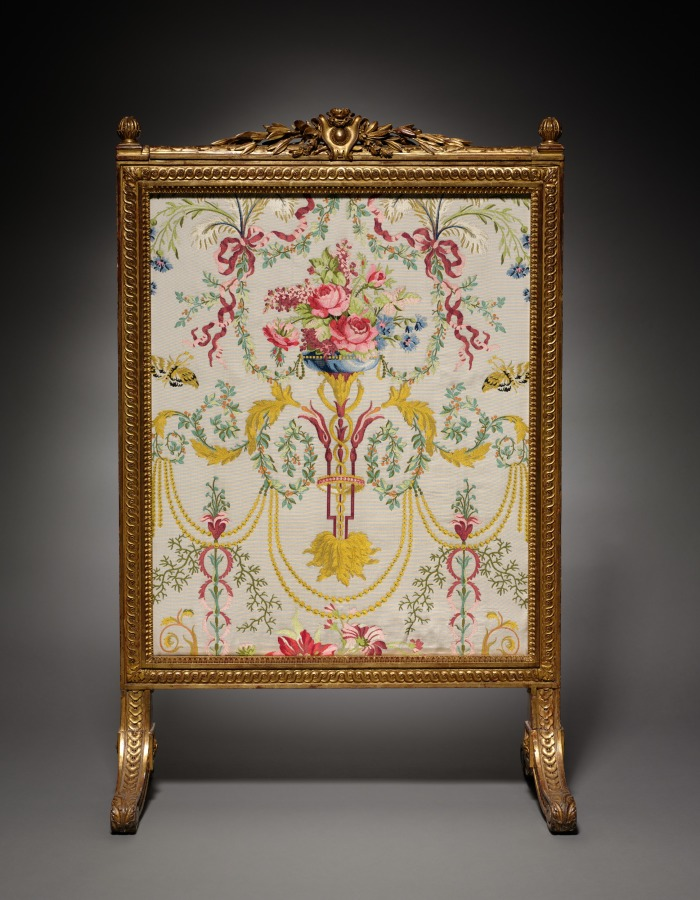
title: Fire Screen (Écran de Cheminée) and Textile Panels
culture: France, Paris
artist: Georges Jacob (French, 1739–1814)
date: c. 1780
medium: gilt wood, upholstery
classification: Furniture and woodwork